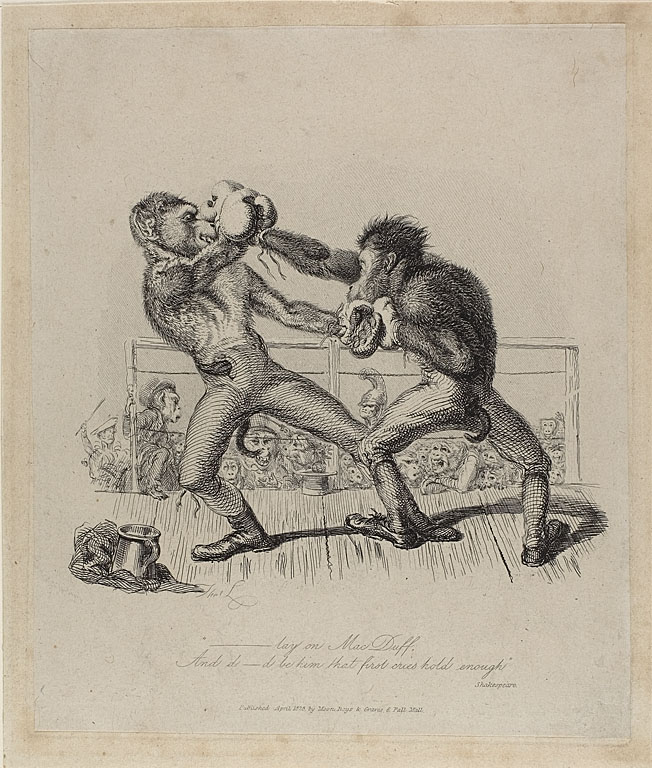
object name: Print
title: Monkeys Boxing, from Monkey-ana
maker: Thomas Landseer (English, 1795-1880)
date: April 1828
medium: Etching in black on paper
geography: England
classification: etching; print; prints and drawing